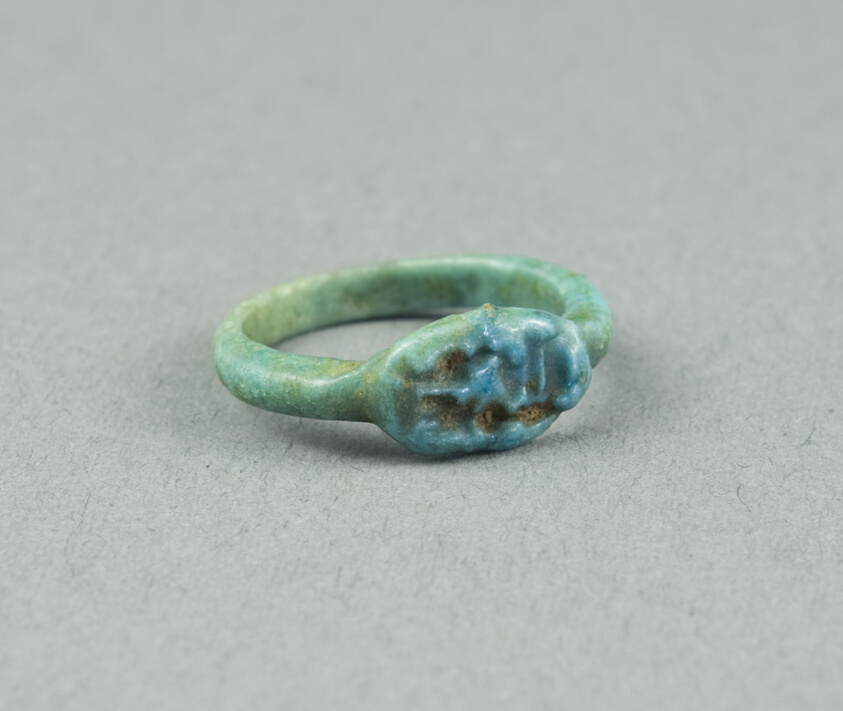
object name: Costume and Accessories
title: Ring: Ramesses (II), Beloved of Amun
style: nineteenth dynasty, new kingdom, egyptian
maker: Egyptian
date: New Kingdom, Dynasty 19, reign of Ramesses II (about 1279–1213 BCE)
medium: Faience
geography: Egypt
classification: ring (jewelry); ceramics; jewelry; ancient art; costume; faïence (composite material)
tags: pharaohs, kings